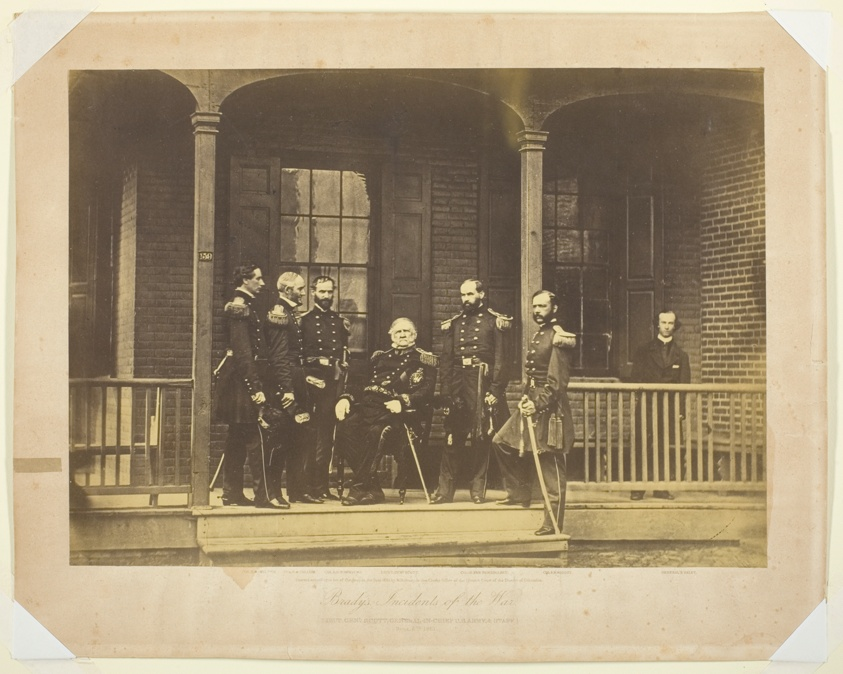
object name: Photograph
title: Lieutenant General Scott, General-in-Chief, U.S. Army and Staff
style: 19th century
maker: Mathew B. Brady; American, 1823–1896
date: 1861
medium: Albumen print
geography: United States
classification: albumen silver print; photographic process; photography; photograph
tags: Collected by Hugh Edwards